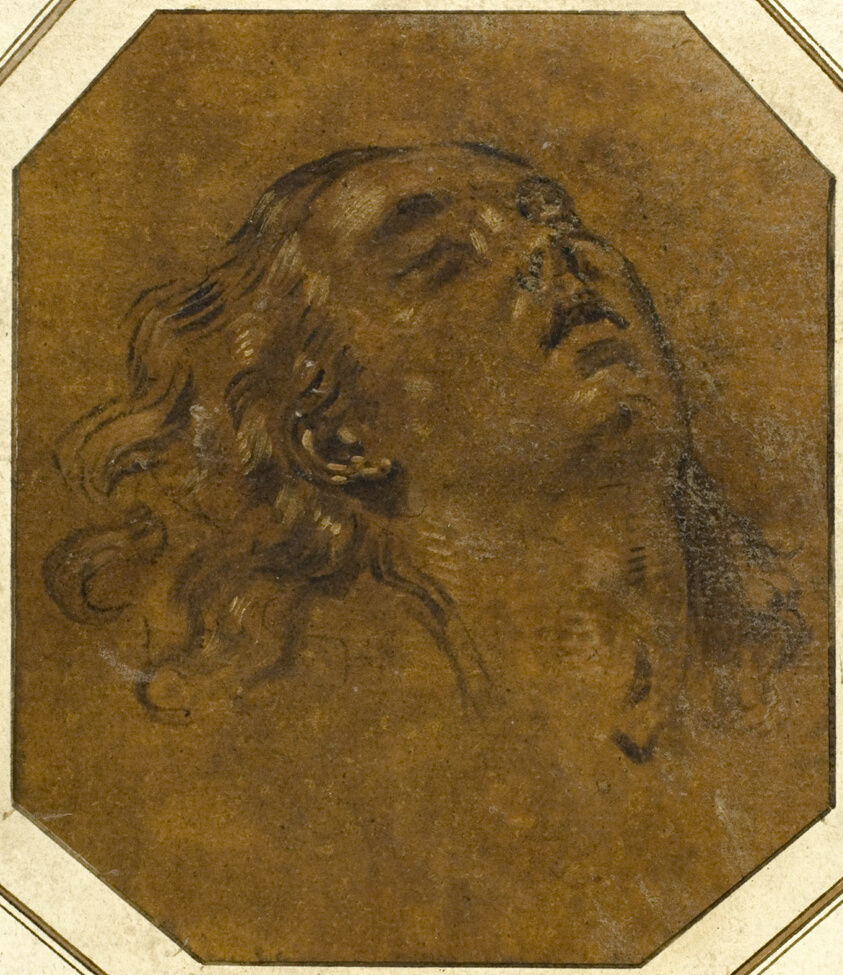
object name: Drawing and Watercolor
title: Female Head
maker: Attributed to Giovan Gioseffo dal Sole; Italian, 1654-1719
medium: Oil paint on laid paper, laid down on ivory laid paper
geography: Italy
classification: charcoal; drawings (visual works); prints and drawing